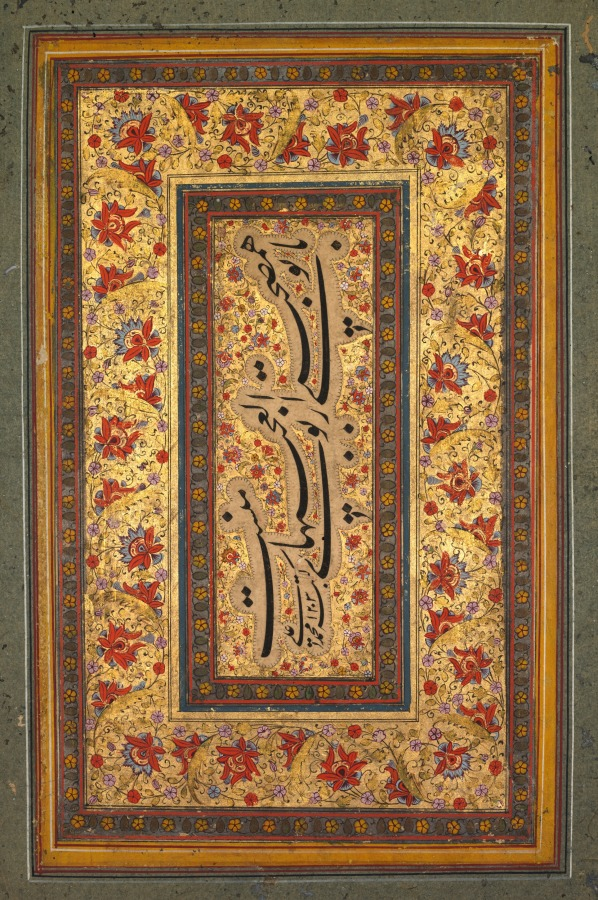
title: Illuminated Leaf with Writing by Muhammad Ali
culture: India, Mughal Dynasty (1526-1756)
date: 1788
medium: ink on paper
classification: Manuscript